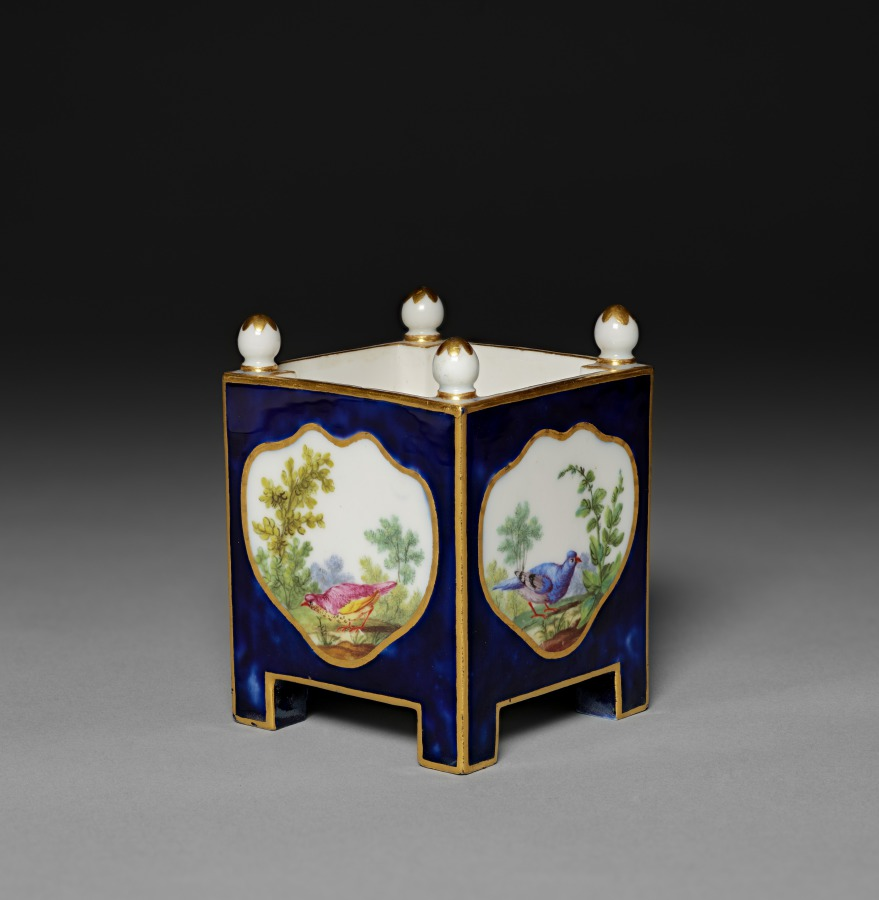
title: Tub-shaped Flower Pot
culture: France, Vincennes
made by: Vincennes Porcelain Factory (France, 1740–56)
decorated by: possibly by Etienne Evans (French, 1733–1806)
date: c. 1752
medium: soft-paste porcelain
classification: Ceramic